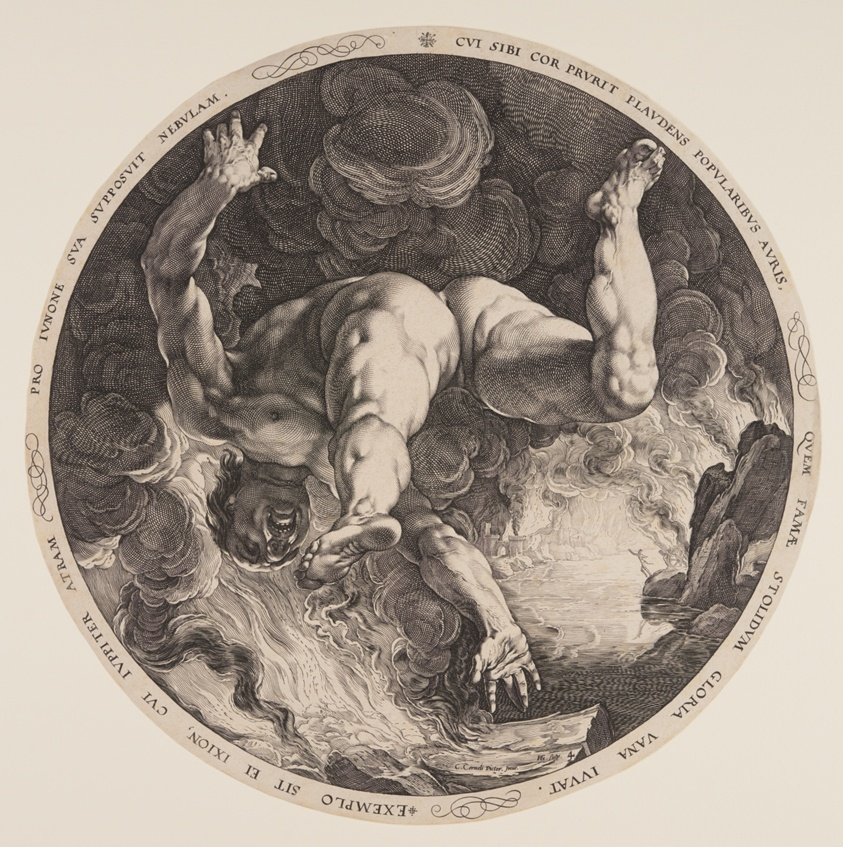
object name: Print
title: Ixion, from The Four Disgracers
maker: Hendrick Goltzius (Dutch, 1558–1617); after Cornelis van Haarlem (Dutch, 1562–1638)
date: 1588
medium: Engraving on ivory laid paper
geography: Netherlands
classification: print; paper; prints and drawing; engraving